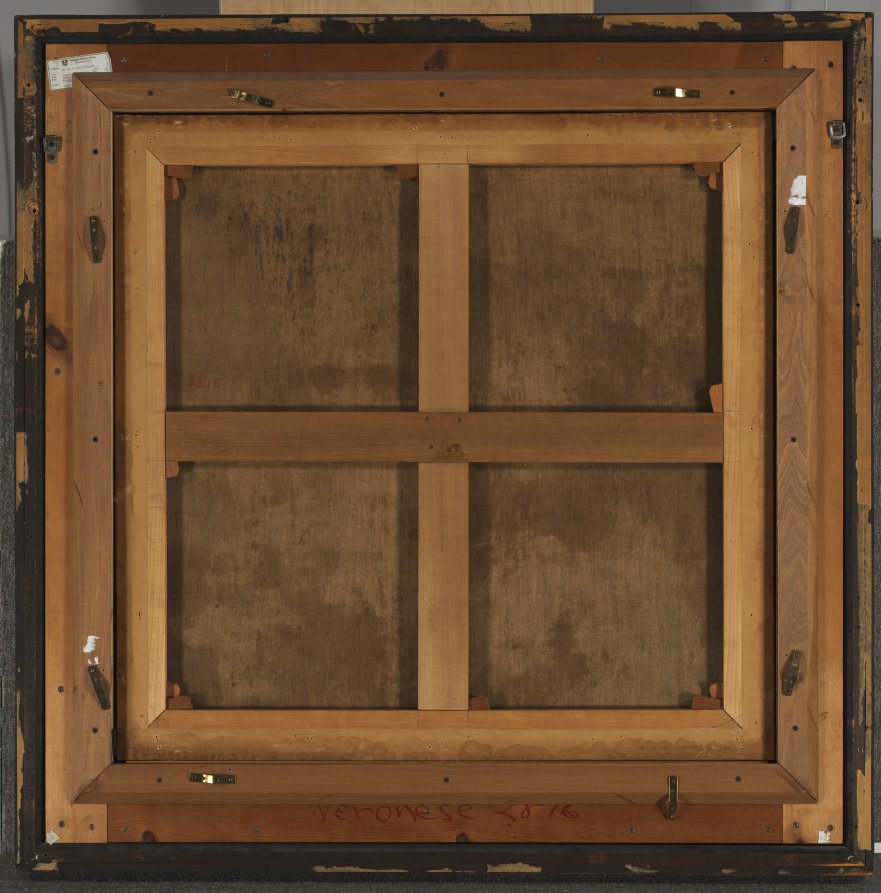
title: Portrait of Agostino Barbarigo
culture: Italy, Venice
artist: Paolo Veronese (Italian, 1528–1588)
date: after c. 1571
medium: oil on canvas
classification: Painting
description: Barbarigo served as second in command of the Venetian naval forces during the Battle of Lepanto, fighting against the Ottoman Empire on October 7, 1571. During the skirmish, Barbarigo was slain by a Turkish arrow, which he holds in the portrait. Barbarigo’s identity is defined by his military prowess. In the 1500s, Venetian military portraits often portrayed the sitter in armor in a pose typical of a Roman emperor, creating a link to the valor and might of ancient armies.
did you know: The arrow symbolically indicates that this portrait was painted after the sitter died in battle.